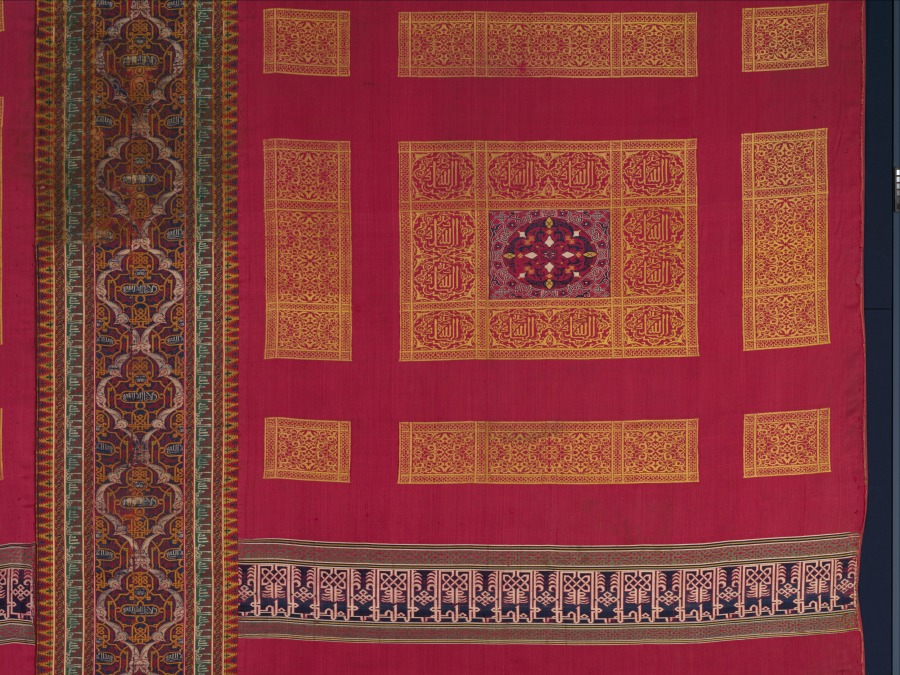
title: Silk curtain from the Alhambra palace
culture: Spain, Granada, Nasrid period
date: 1300s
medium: lampas and taqueté: silk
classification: Textile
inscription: the bold knotted Kufic inscription in the top and bottom borders of the side panels repeats the Arabic word "felicity." Within the arches forming a frieze in the top border is a Kufic inscription "good fortune" and a Naskhi inscription repeating trhe motto of the Nasrid dynasty, "There is no conqueror but God." In the borders of the three large ornamental rectangles on each side panel is the Naskhi inscription "Dominion belongs to God alone." On the central panel the inscriptions in the borders repeat the phrase, "Majestry is God's," while the Nasrid motto, "There is no conqueror but God" and, above, "Blessing," are inscribed in the arabesque ogives.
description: This is one of two of the largest, most complete, and most ornate curtains to survive from the 1300s when it presumably hung in the royal Alhambra Palace in Granada, the last Muslim stronghold in Spain. Its style, artistic vocabulary, and harmonious proportions reflect the magnificent wall decoration in the Alhambra. The motto of the ruling Nasrid dynasty, "There is no conqueror but God," is inscribed in the end borders and central panel. The inscribed striped silk forming the central panel is more worn, suggesting that it was recycled, most likely during the 1300s.